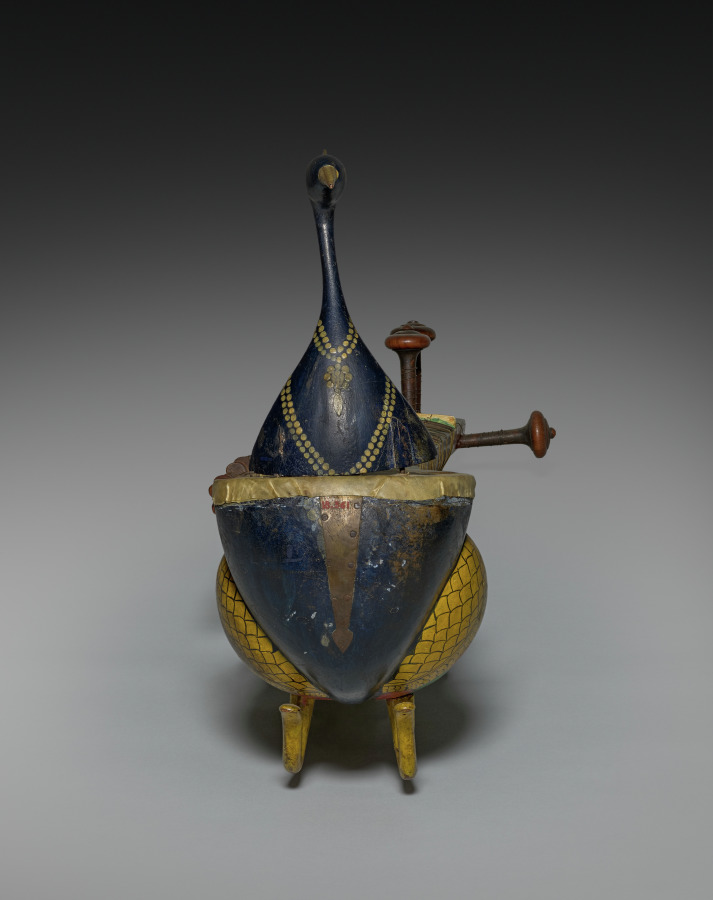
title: Taus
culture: India, Punjab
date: c. 1800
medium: Polychromed wood, parchment, bone or ivory, gut, and metal strings; frets: bronze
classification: Musical Instrument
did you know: The taus was designed by a Sikh Guru to combine the sounds of string instruments and the plaintive cry of the peacock.